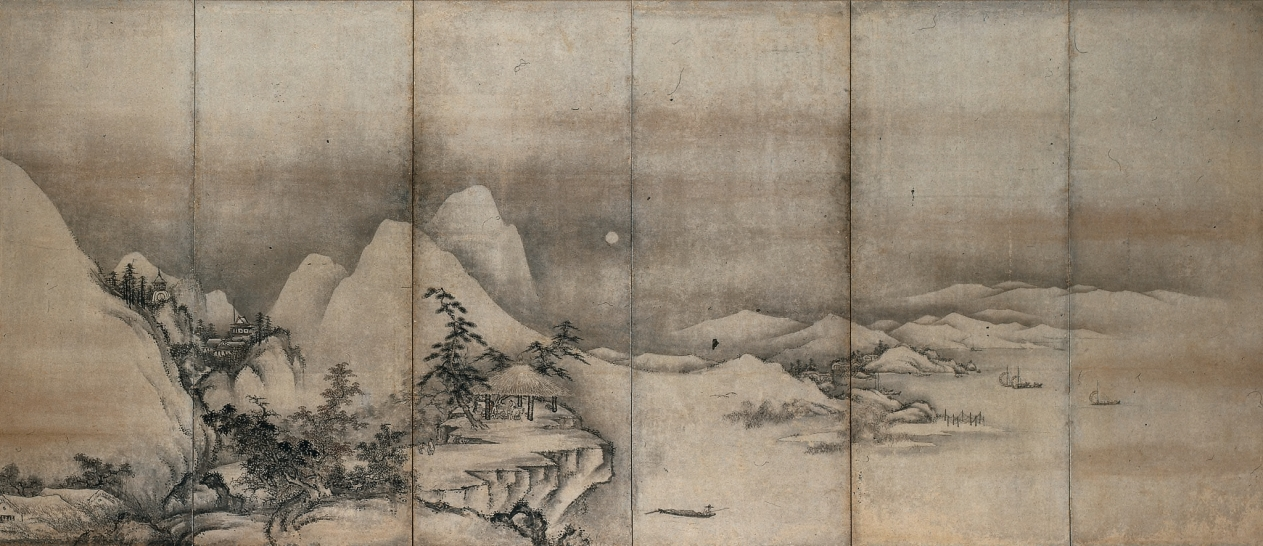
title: Chinese Landscape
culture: Japan, Muromachi period (1392–1573)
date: 1500s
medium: One of a pair of six-fold screens; ink and slight color on paper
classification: Painting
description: In a panorama of mountains and expanses of water, three gentlemen have assembled by moonlight to enjoy one another’s company away from a bustling village. An influx of ink paintings from China in both album and scroll formats beginning in the late 1200s inspired Japanese artists to create landscapes based upon Chinese prototypes. Later, Japanese painters adapted the imagery to the larger format of folding screens, which were used to define spaces in large rooms.